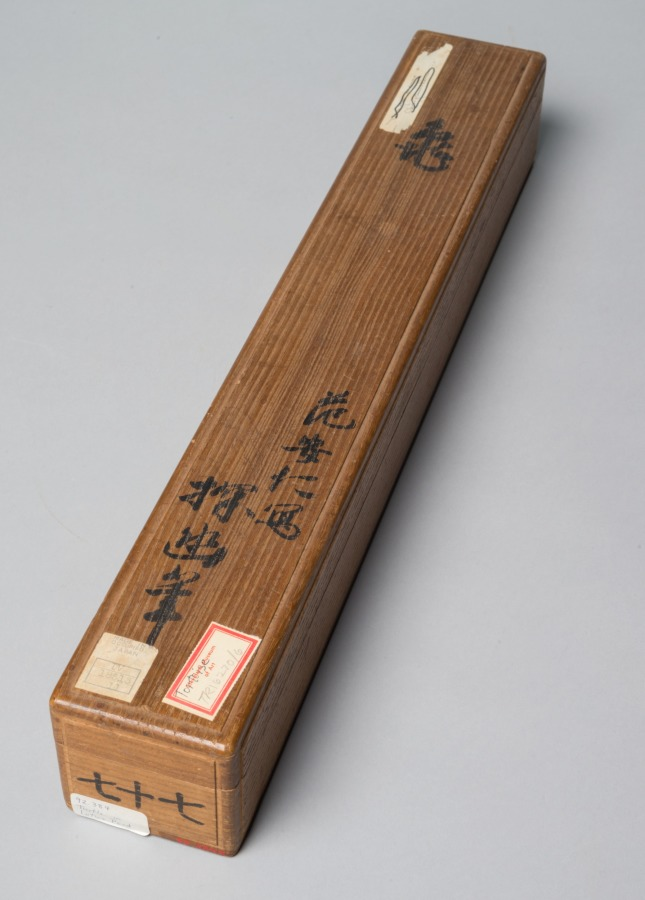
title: Turtle in a Lotus Pond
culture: Japan, Edo period (1615–1868)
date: 1700s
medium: hanging scroll; ink on paper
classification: Painting